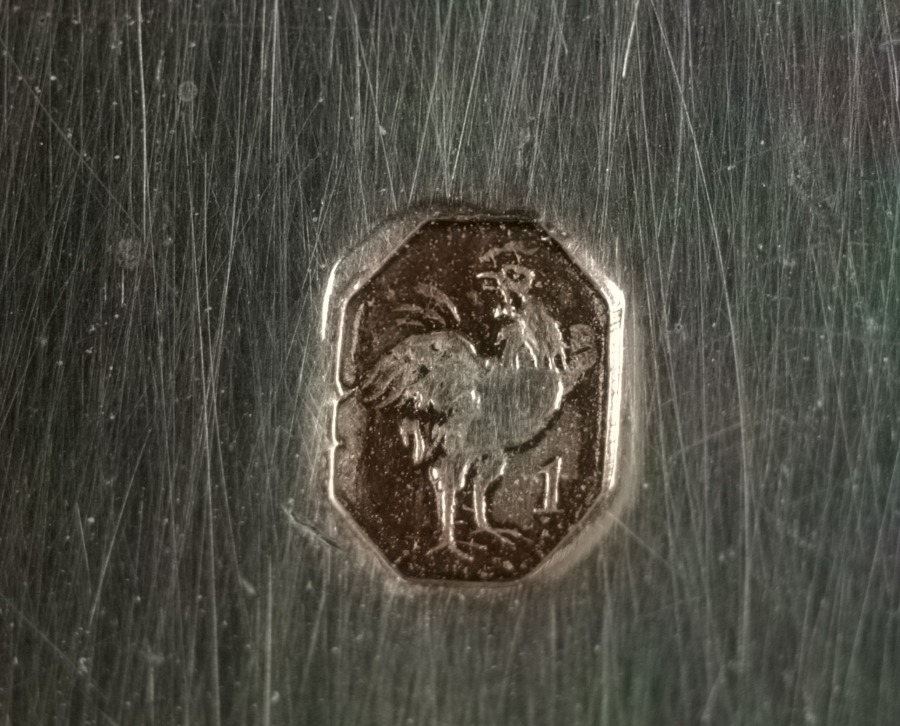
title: Covered Tureen on Stand (Pot à oille)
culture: France, late 18th-early 19th Century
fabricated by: Henry Auguste (French, 1759–1816)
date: 1797–98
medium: silver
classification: Silver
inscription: [Coat-of-arms of Amoral don Federico Carlos Gravina on bowl; cover; stand]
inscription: [Assay mark for large-sized work, 1798-1809, lining exterior; tureen foot exterior]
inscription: [Assay mark for medium-sized work, 1798-1809, beneath stand foot; on edge of cover]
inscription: [Maker's mark of Henri Auguste, master silversmith in 1785, beneath tureen foot; beneath stand foot; inside stand foot edge]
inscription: [Official assay mark for first standard silver, Paris, 1798-1809, beneath stand foot; lining exterior; on cover]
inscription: [Official mark for silver imported from countries with customs conventions, 1838-1912, beneath stand foot; edge of cover; tureen lip exterior; lining exterior; on one tureen handle; outside stand foot; tureen foot exterior]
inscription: [Unknown mark, possibly Ceres' profile in square with "E" and "7", beneath stand foot; on cover; rim of lining; tureen foot exterior; tureen lip exterior]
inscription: [Unofficial assay mark for first standard silver, Paris, 1794-1797, beneath foot stand; beneath tureen foot; near tureen handle exterior]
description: This pot-à-oille was designed by master goldsmith Henri Auguste after drawings by draftsman and sculptor Jean Guillaume Moitte. Though many of the neoclassical decorative elements on this piece are pulled from Moitte’s design, Auguste’s final product leaves out much of the proposed ornamentation. Instead this object finds distinction in its large size and smooth expanses of silver that emphasize the purity of its lines.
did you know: The coat of arms on the body of the work corresponds to the family of Federico Carlos Gravina, a Sicilian-Spanish admiral who was known to have had a close diplomatic relationship with Napoleon I.